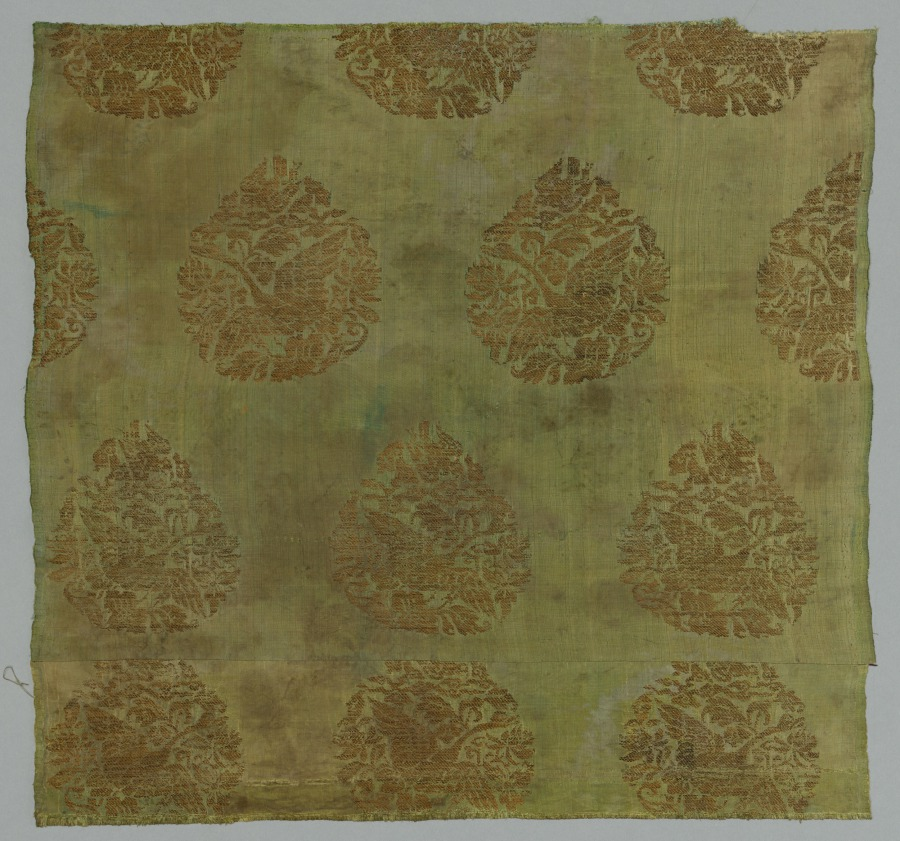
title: Brocade with Swan Hunt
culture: China, Jin dynasty (1115-1234)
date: 1115–1234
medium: tabby, brocaded; silk and gold thread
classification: Textile